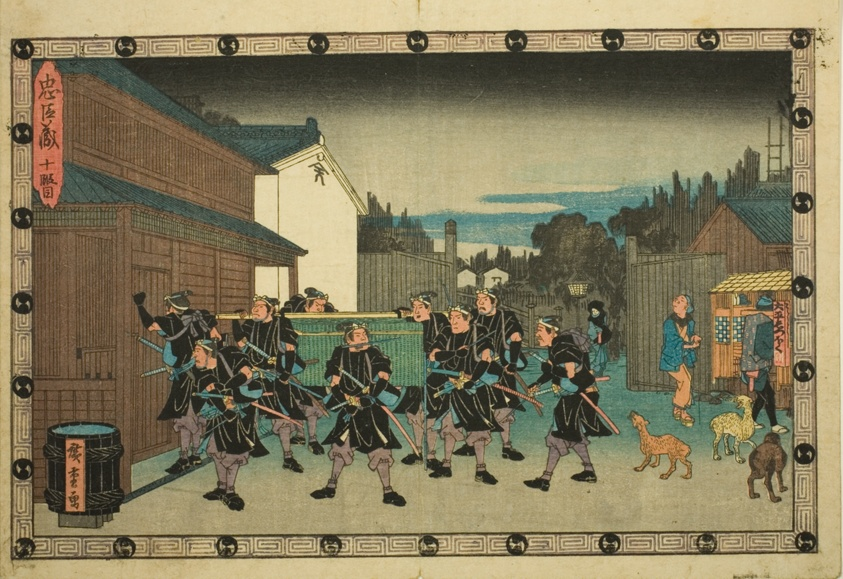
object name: Print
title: Act 10 (Judanme), from the series "The Revenge of the Loyal Retainers (Chushingura)"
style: Japanese (culture or style)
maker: Utagawa Hiroshige 歌川 広重; Japanese, 1797-1858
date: c. 1834/39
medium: Color woodblock print; oban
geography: Japan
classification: woodblock print; print; asian art